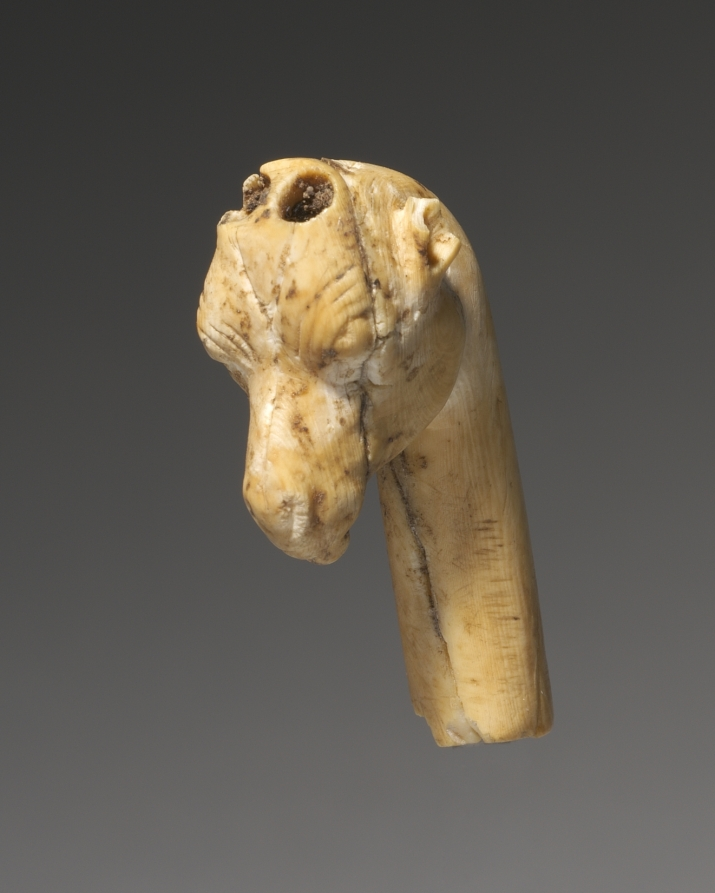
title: Giraffe Head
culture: Egypt, New Kingdom (1540–1069 BCE), Dynasty 18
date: c. 1540–1296 BCE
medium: ivory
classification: Cosmetic Objects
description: Both ancient Egyptian men and women loved cosmetics. Unguents, oils, and perfumes made from aromatic plant resins and gums were obtained at great cost from distant lands. The objects identified with cosmetics were given lavish treatment. The delicately head of a giraffe would have decorated an elaborate ivory cosmetic spoon.